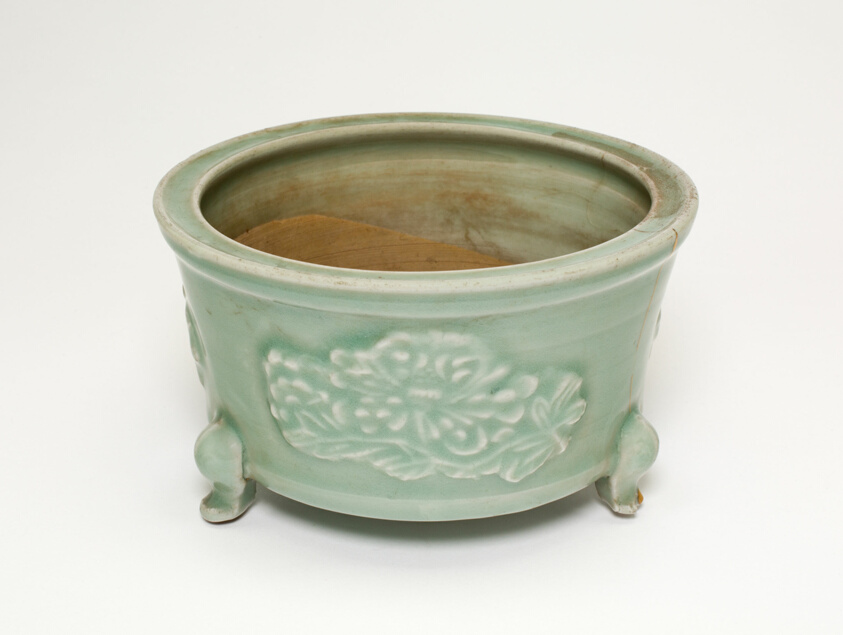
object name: Decorative Arts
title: Tripod Incense Holder with Floral Design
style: Chinese (culture or style)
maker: China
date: Ming dynasty (1368–1644)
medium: Celadon-glazed stoneware with underglaze molded decoration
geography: China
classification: ceramics; asian art; decorative arts